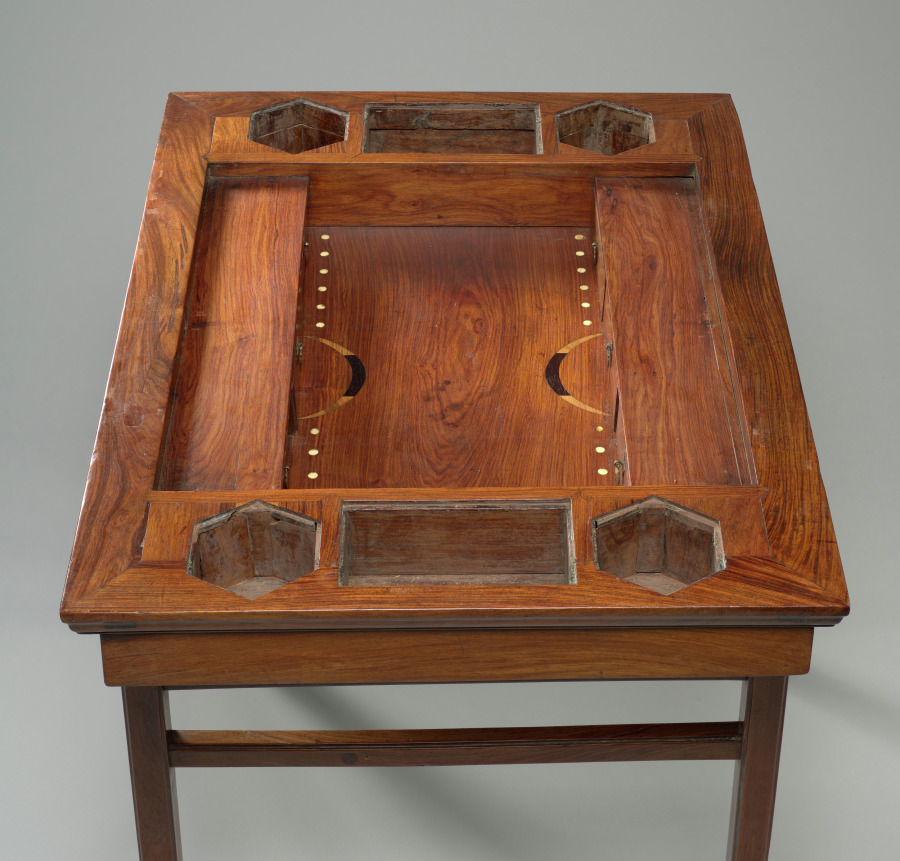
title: Game Table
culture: China, Ming dynasty (1368-1644) - Qing dynasty (1644-1911)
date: 1600s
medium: Rosewood (huanghuali)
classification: Furniture and woodwork